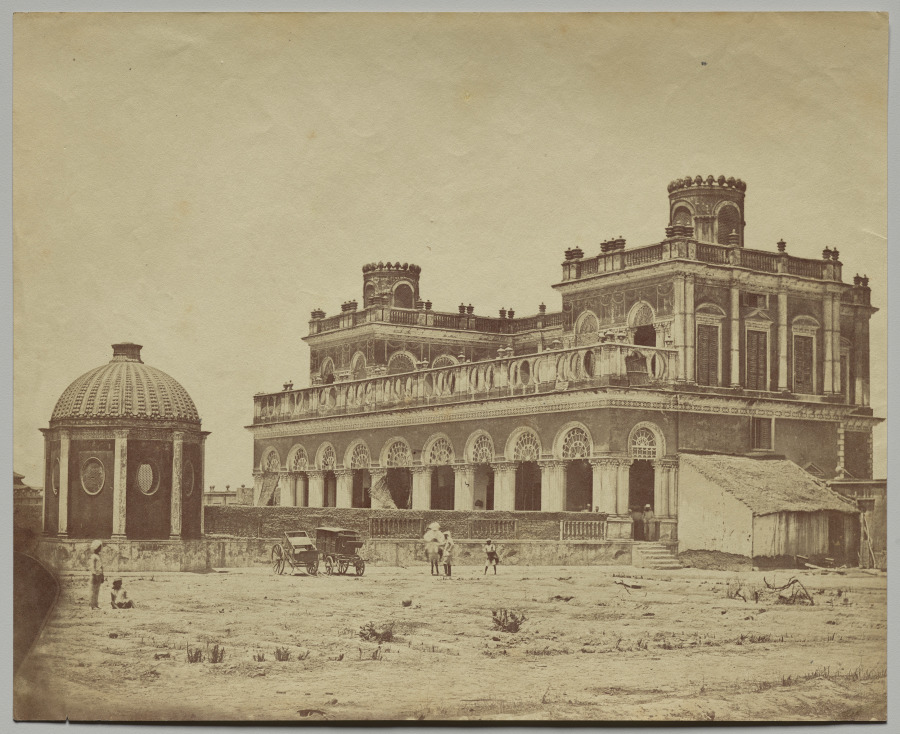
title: The Musabagh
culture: England, 19th century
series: Lucknow After the Siege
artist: Felice A. Beato (British, 1832–1909)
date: 1858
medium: albumen print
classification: Photograph